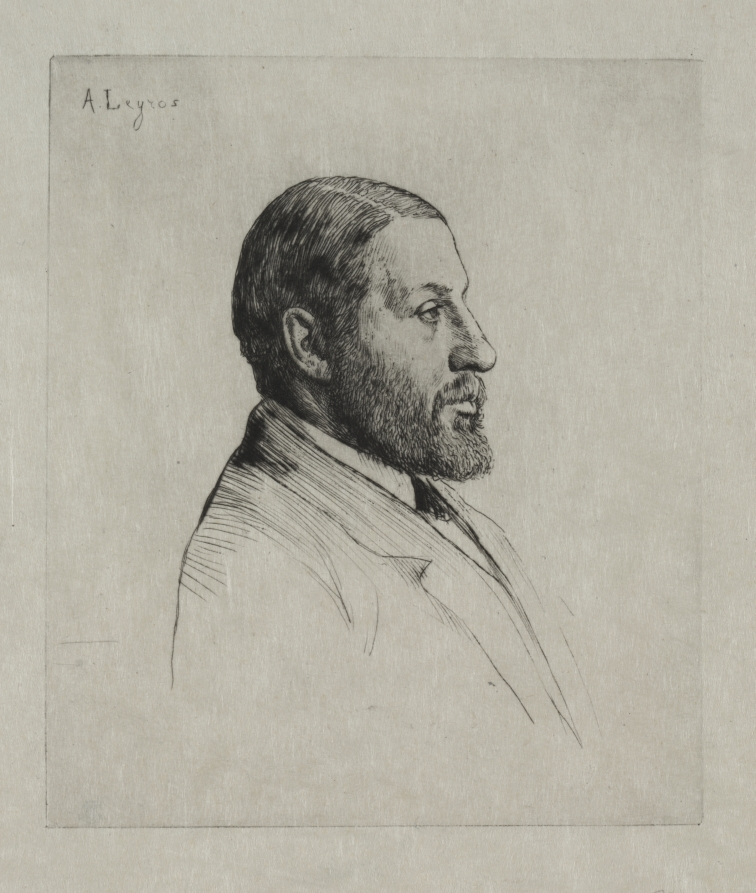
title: Murray Marks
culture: France, 19th century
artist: Alphonse Legros (French, 1837–1911)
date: c. 1857–1911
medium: drypoint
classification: Print